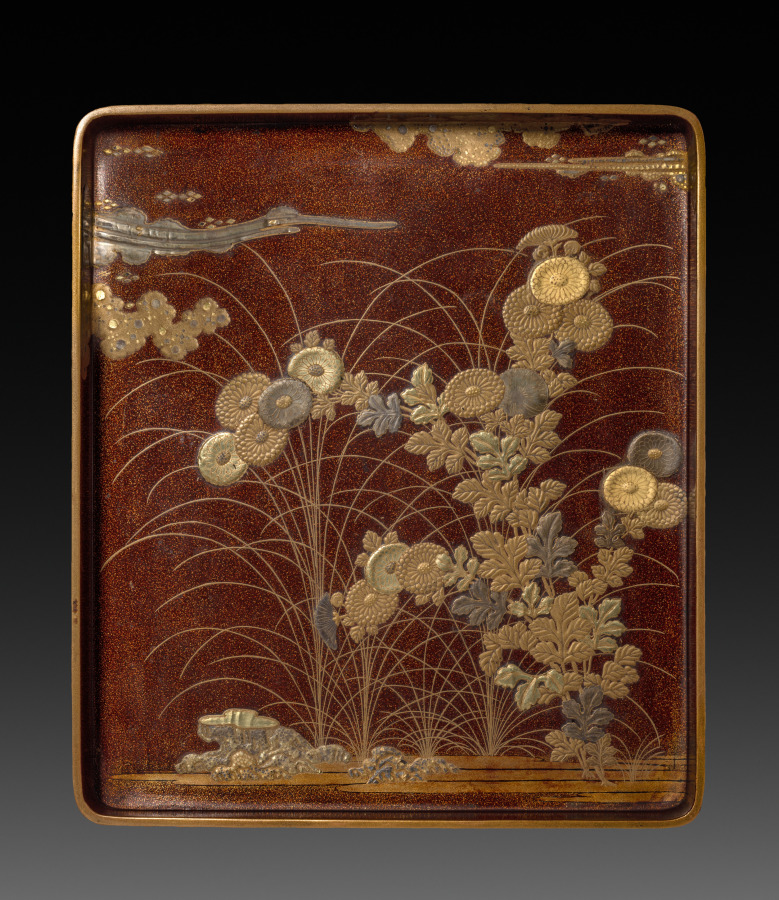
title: Writing Box (Suzuribako) with Phoenix in Paulownia (lid)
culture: Japan, Momoyama period (1573–1615)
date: c. 1573–99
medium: Lacquer on wood with sprinkled gold and silver powder (maki-e) and gold and silver foil application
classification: Lacquer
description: The only place the mythical phoenix will perch is in the paulownia tree. Along with the dragon, the bird is a symbol of imperial power in East Asia. This box––a container for an inkstone, brushes, and ink––is both functional and lavish, its dramatic effects achieved with a pear-skin ground decoration (nashiji) and sprinkled powder decoration in high relief (takamaki-e).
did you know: In contrast to the bright, celebratory motifs on the exterior, the interior of the box invites a more reflective mood with its autumn moonlit sky over chrysanthemums.